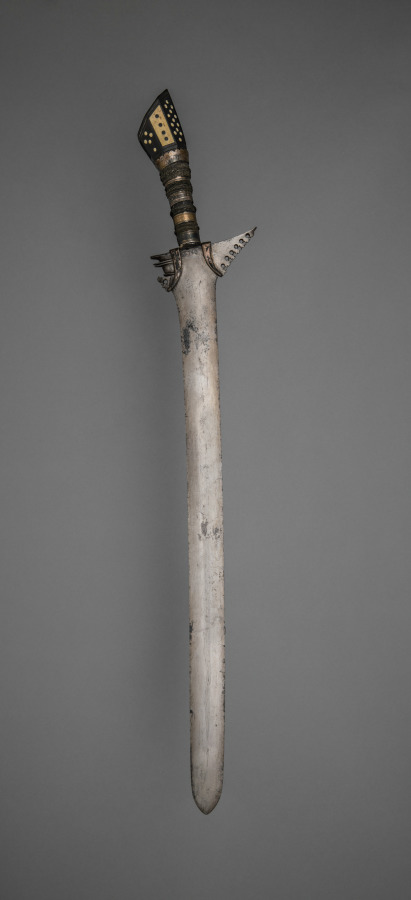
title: Sword (Kris)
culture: Philippines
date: before 1916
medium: Blade: metal; handle: metal with silver ferrules and braided wire; pommel: wood with inlays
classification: Arms and Armor